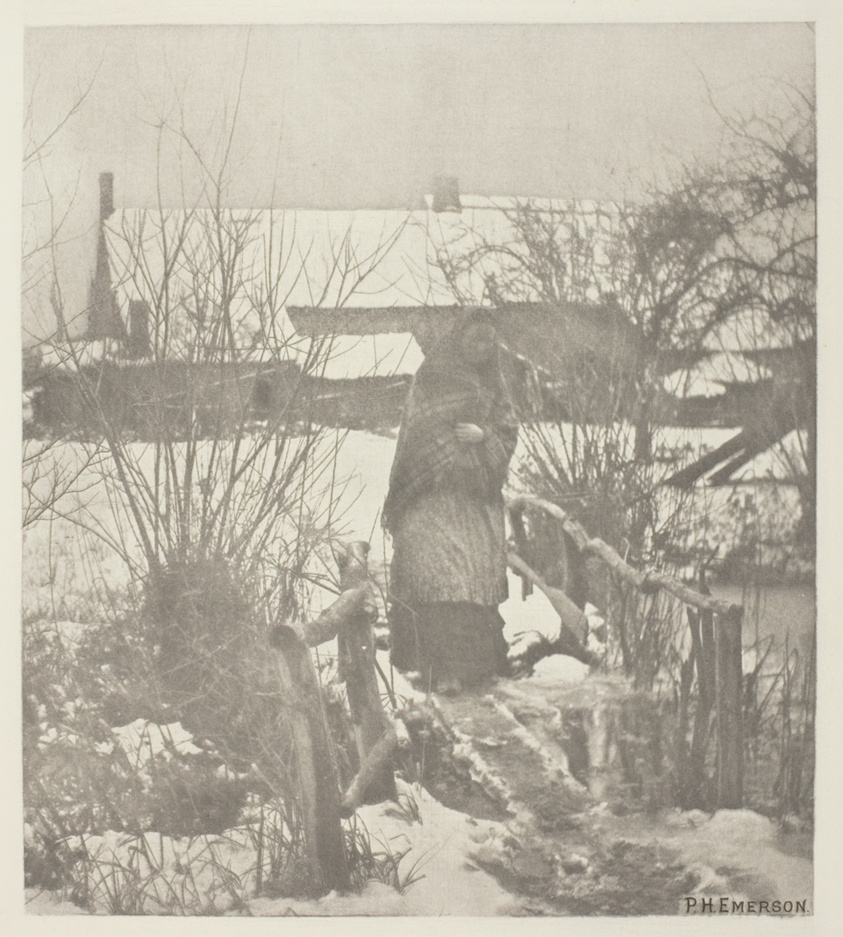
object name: Photograph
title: A Slippery Path - Winter Scene (Norfolk)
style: 19th century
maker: Peter Henry Emerson (English, born Cuba, 1856–1936)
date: c. 1883/87, printed 1888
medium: Photogravure, plate XXXIII from the album "Pictures of East Anglian Life" (1888)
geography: England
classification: photogravure; photomechanical process; photography; photograph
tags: Collected by Hugh Edwards, Pictures of East Anglian Life, Seat of War in the Crimea